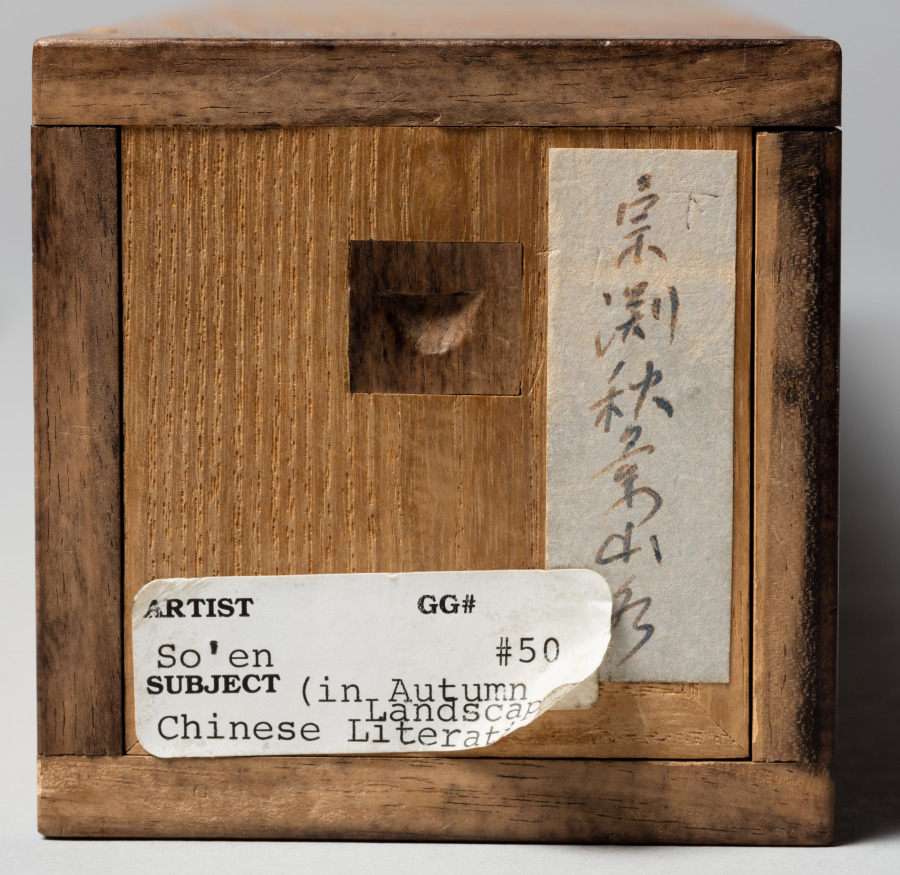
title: Chinese Literatus in an Autumn Landscape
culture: Japan, Muromachi period (1392–1573)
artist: Josui Sōen (Japanese, active c. 1489–1500)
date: late 1400s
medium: hanging scroll; ink on paper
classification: Painting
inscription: Signed: "Sō'en" 宗淵. Sealed: "Josui" 如水; one seal unread.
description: In this painting, Sesshū Tōyō’s disciple Sōen depicts a Chinese scholar-official astride a donkey with his attendant behind. Framing their passage on the right side of the scene are two bare willows, and on the left, geese in flight, the cries of which capture the pair’s attention. These elements suggest that the season is late autumn. Sōen, who famously received Sesshū’s 1495 Splashed-ink Landscape as a certificate of his success as a pupil, studied with the master in Suō, presentday Yamaguchi, after which he returned to his native province in the Kanto region.